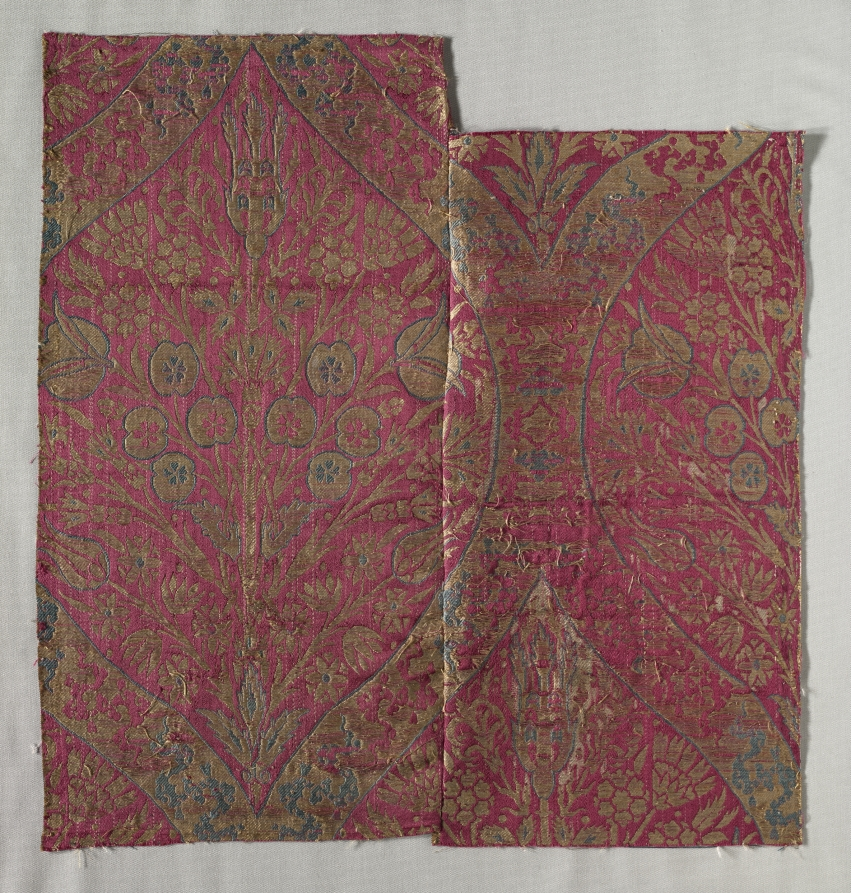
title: Gold Brocade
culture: Turkey, last quarter of the 16th century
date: 1575–1600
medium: silk: compound weave, metal thread weft, brocading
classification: Textile